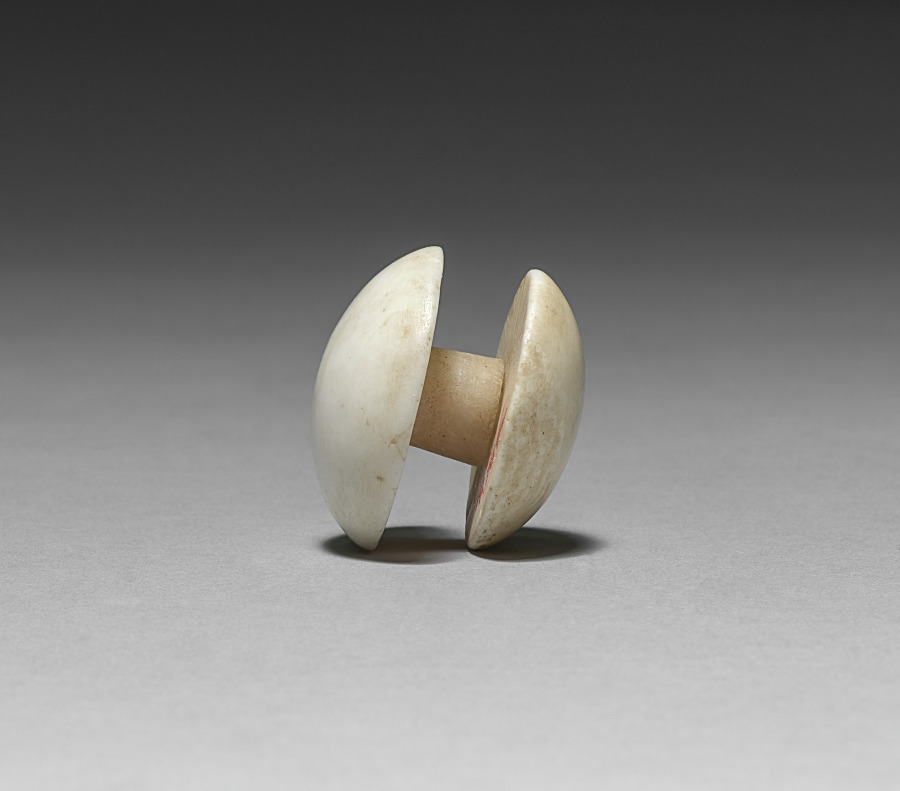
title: Pair of Ear Studs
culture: Egypt, New Kingdom (1540–1069 BCE), Dynasty 18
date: 1540–1296 BCE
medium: travertine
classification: Jewelry